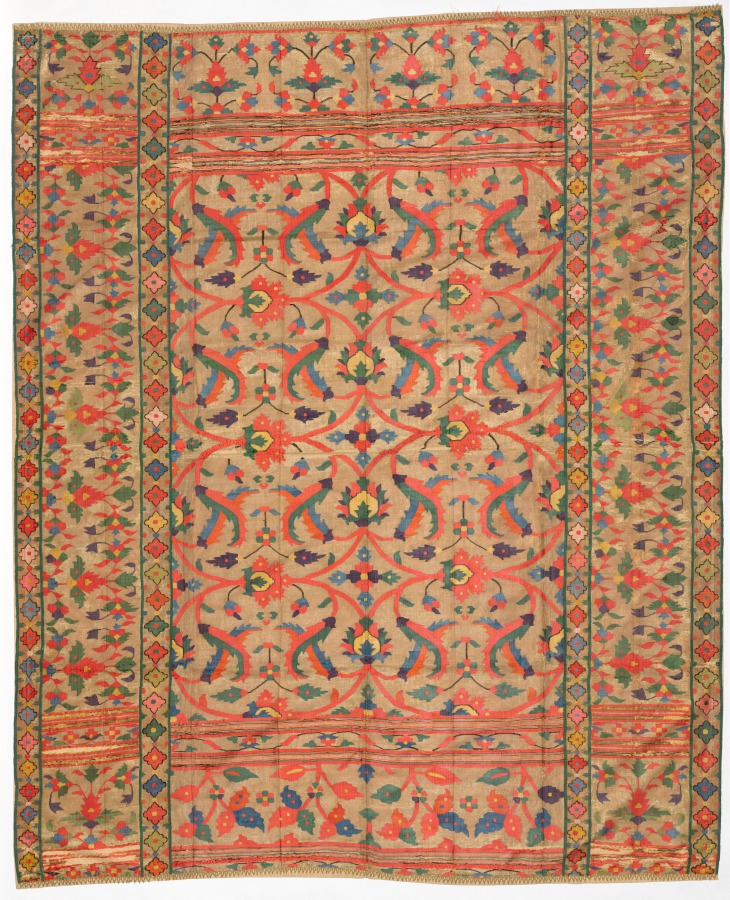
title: Fragment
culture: India, 18th-19th century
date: 1700s - 1800s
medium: tapestry weave: silk, metal thread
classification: Textile